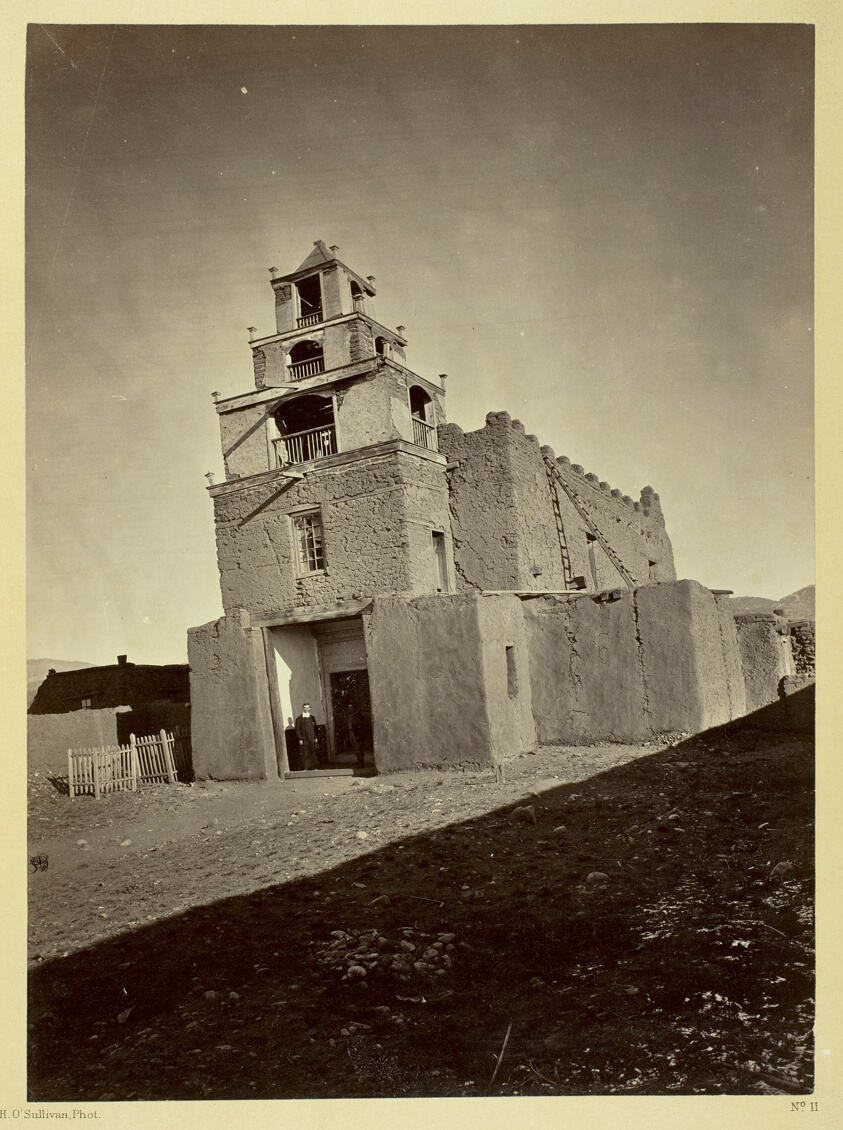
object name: Photograph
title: The Church of San Miguel, the Oldest in Santa Fe, N.M.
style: 19th century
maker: Timothy O'Sullivan (American, born Ireland, 1840–1882)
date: 1873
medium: Albumen print, from the album "Geographical & Geological Explorations & Surveys West of the 100th Meridian," vol. 2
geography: United States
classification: albumen print from collodion negative; photograph; photography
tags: Collected by Hugh Edwards